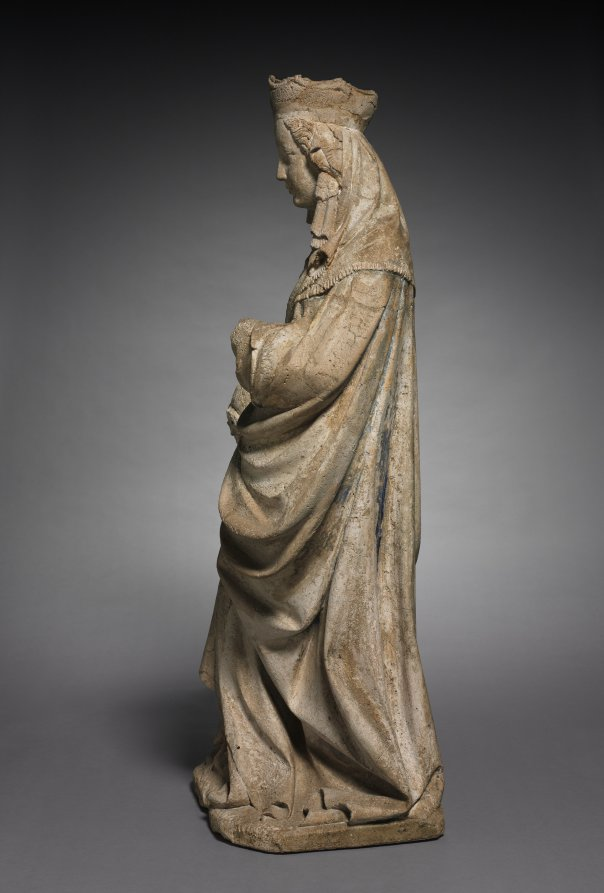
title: Virgin and Child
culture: Austria, Lungau, Church of Mariapfarr, late 14th century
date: c. 1395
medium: cast stone with traces of original paint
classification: Sculpture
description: This sculpture—damaged during the 1800s and now missing the figure of the Christ child—is a fine early example of the type known as the Schöne Madonna or "Beautiful Virgin." This type became popular around 1400 and emphasized the graceful curve of the Virgin’s posture combined with deep, slightly exaggerated drapery folds. This sculpture is known to have come from the Church of Mariapfarr in the Diocese of Salzburg. It was made using a casting technique known as "lost shape." The casting consisted of pulverized limestone combined with quicklime and milk curd poured into a mold. After the cementlike mixture set for several weeks, the mold was destroyed to remove the sculpture, which could then be filed, polished, and painted.